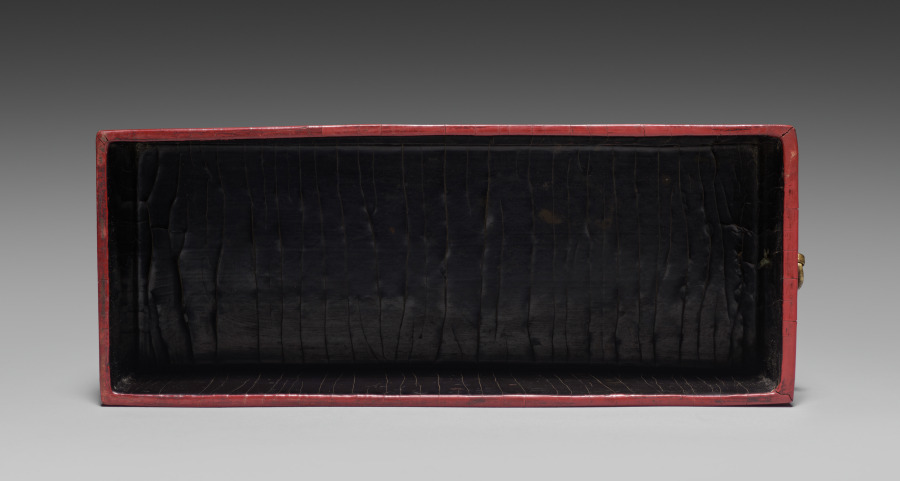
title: Drawer for a Tihong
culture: China, Ming dynasty (1368-1644), Wanli reign (1572-1620)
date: 1585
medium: carved cinnabar lacquer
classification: Lacquer